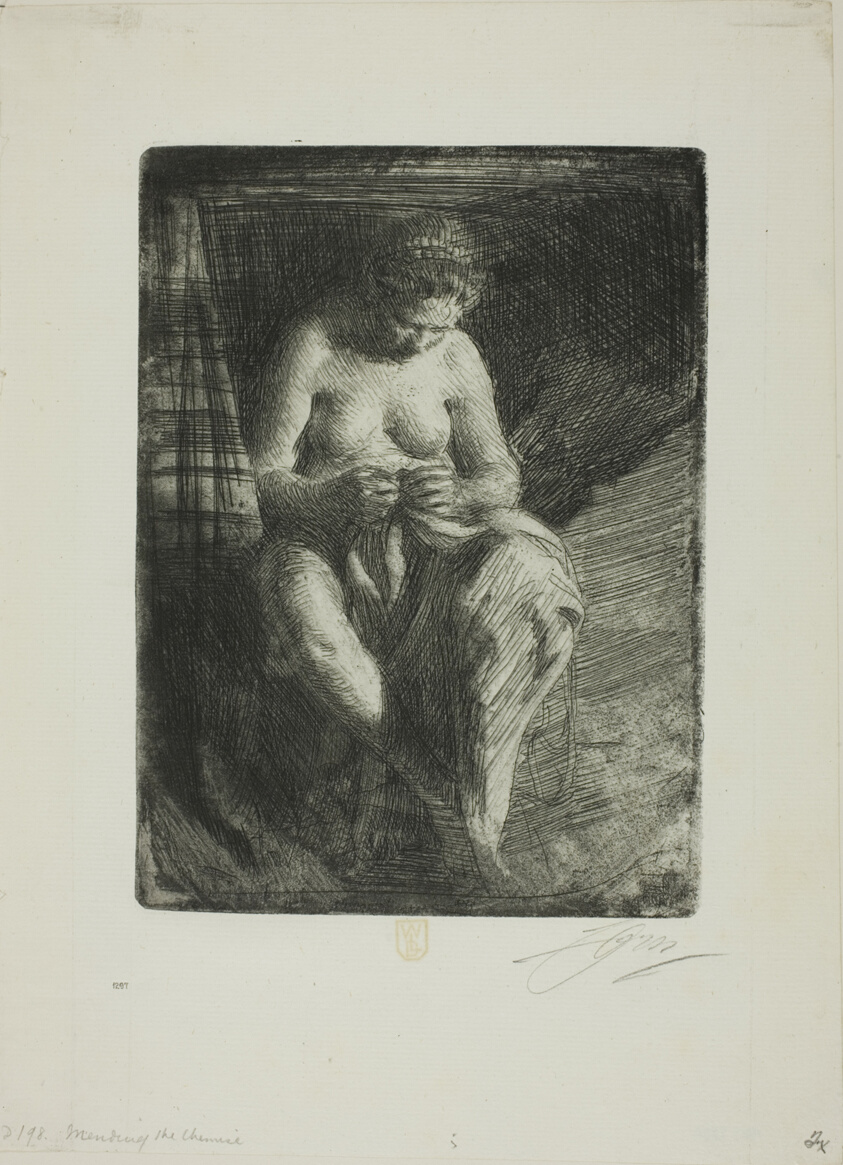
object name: Print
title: Mending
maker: Anders Zorn (Swedish, 1860-1920)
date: 1905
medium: Etching on ivory laid paper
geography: Sweden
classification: etching; print; prints and drawing